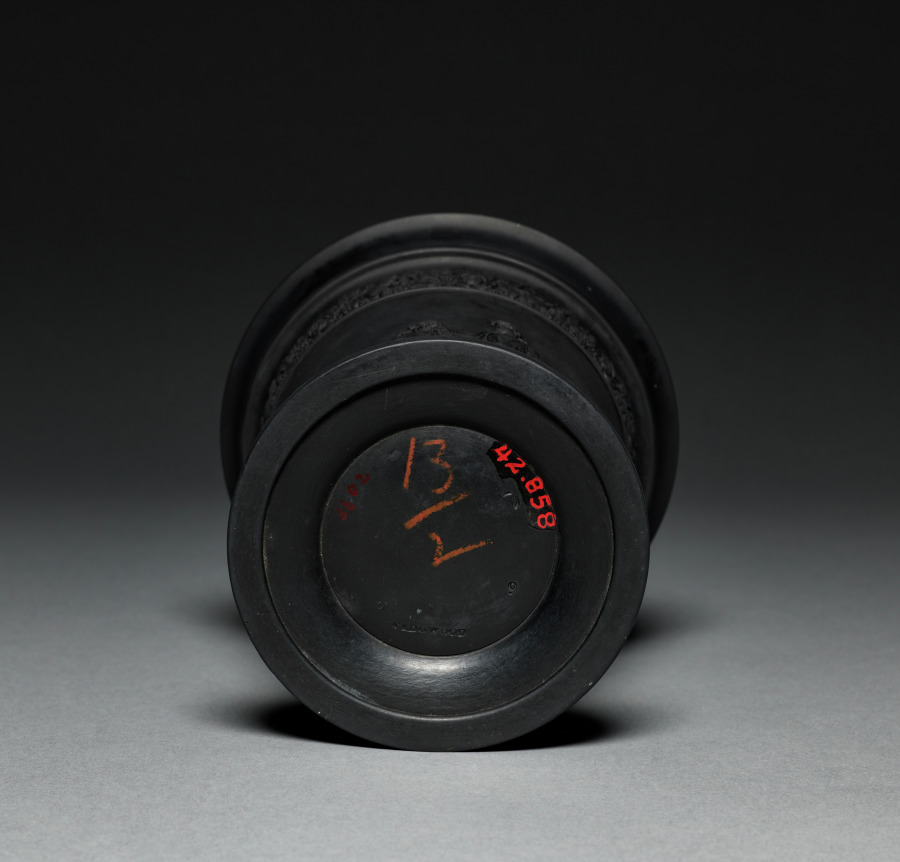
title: Jardiniere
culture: England, Staffordshire, 18th century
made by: Wedgwood Factory (British)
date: late 1700s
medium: black basalt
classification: Ceramic